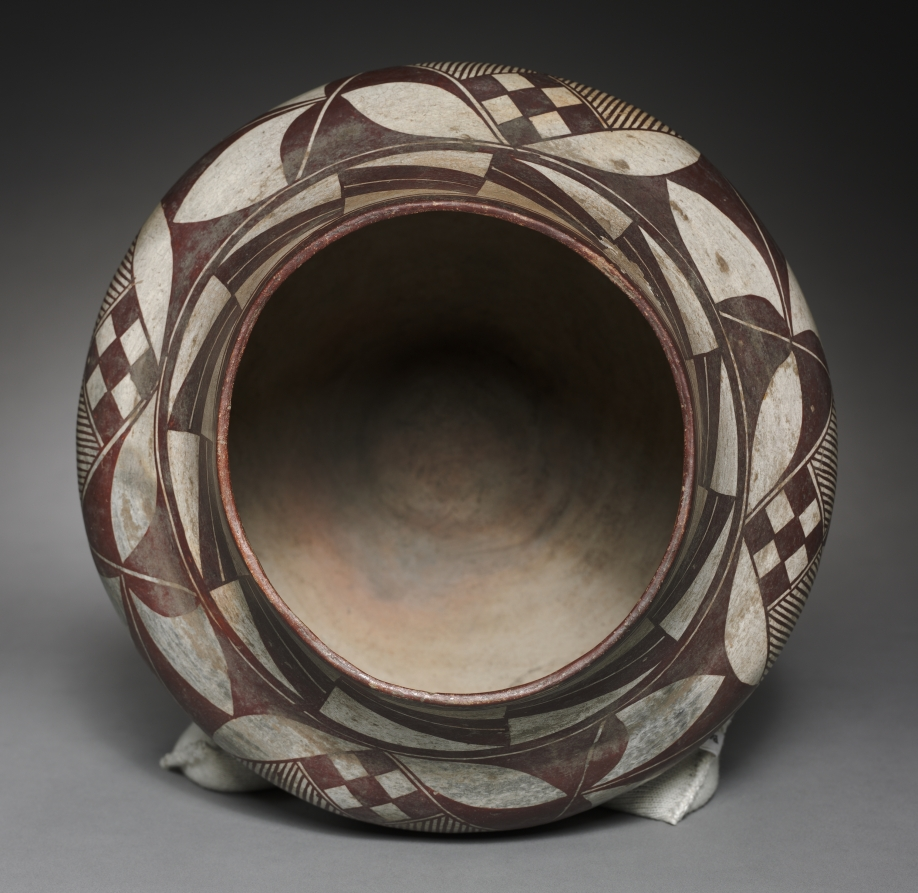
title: Water Jar (Olla)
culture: Native North America, Southwest, New Mexico, Acoma Pueblo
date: 1880s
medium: ceramic, slip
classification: Ceramic